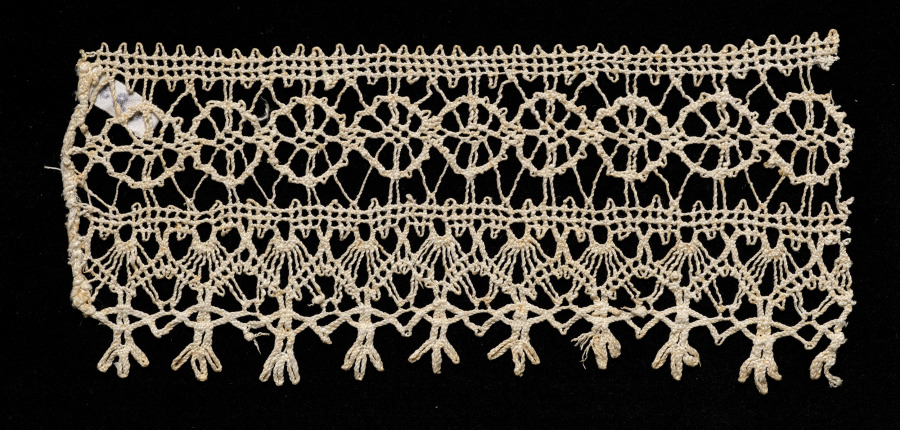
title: Lace Insertion with Edging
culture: Italy, Venice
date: 1580–99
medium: Bobbin lace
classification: Lace